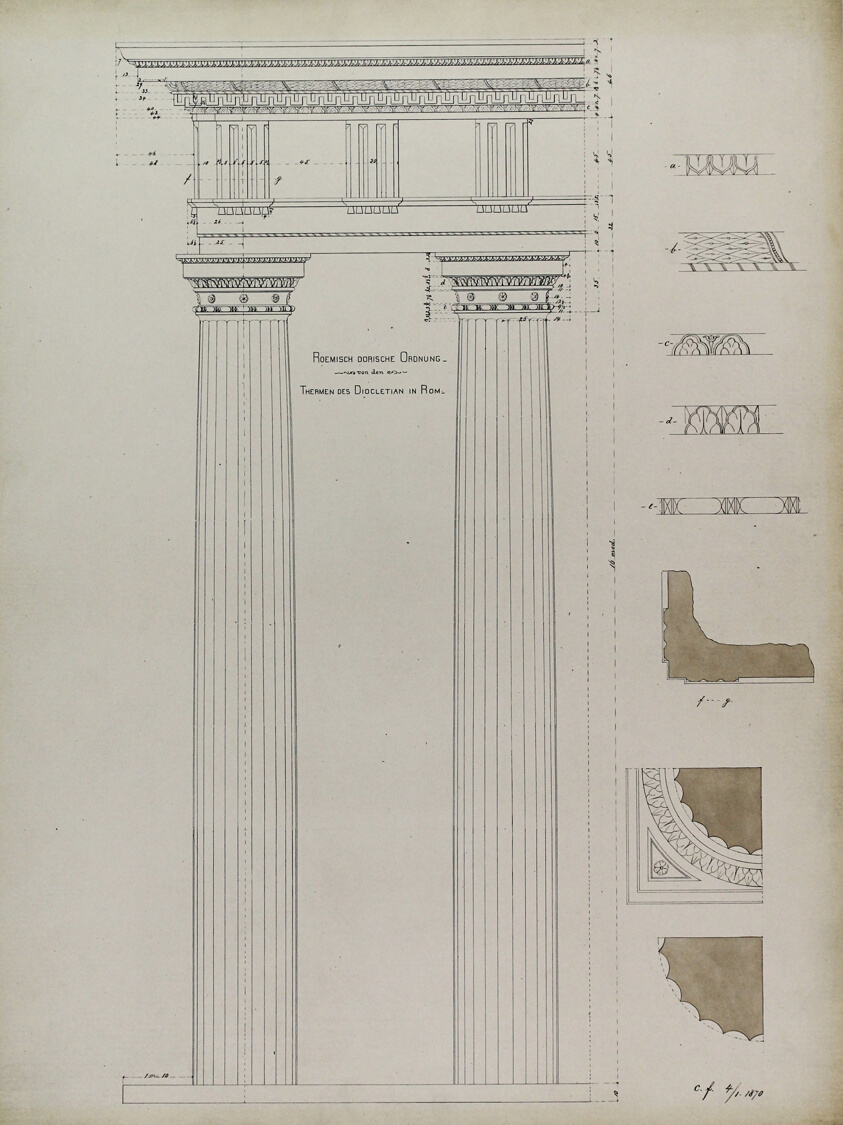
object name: Architectural Drawing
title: Orders of Architecture, Roman Doric Order from Baths of Diocletian, Rome, Italy, Elevation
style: 19th century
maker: Carl (Charles) J. Furst (American, born Germany c. 1840–c. 1919)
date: April 1, 1870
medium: Ink and ink wash on drawing paper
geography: United States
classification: elevation; architectural detail; architecture; design; drawings (visual works); architectural drawing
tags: columns, Rome, baths, architectural fragments, architecture